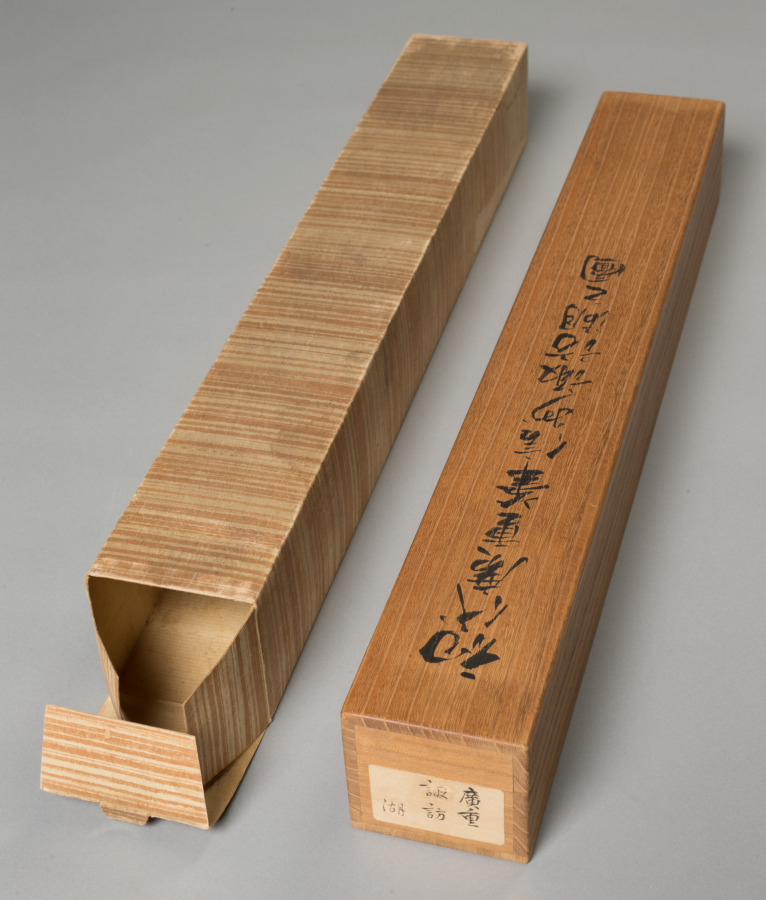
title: Lake Suwa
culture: Japan, Edo period (1615–1868)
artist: Utagawa Hiroshige (Japanese, 1797–1858)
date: c. 1832–58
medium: hanging scroll; ink and color on silk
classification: Painting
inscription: 立斎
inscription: 廣重